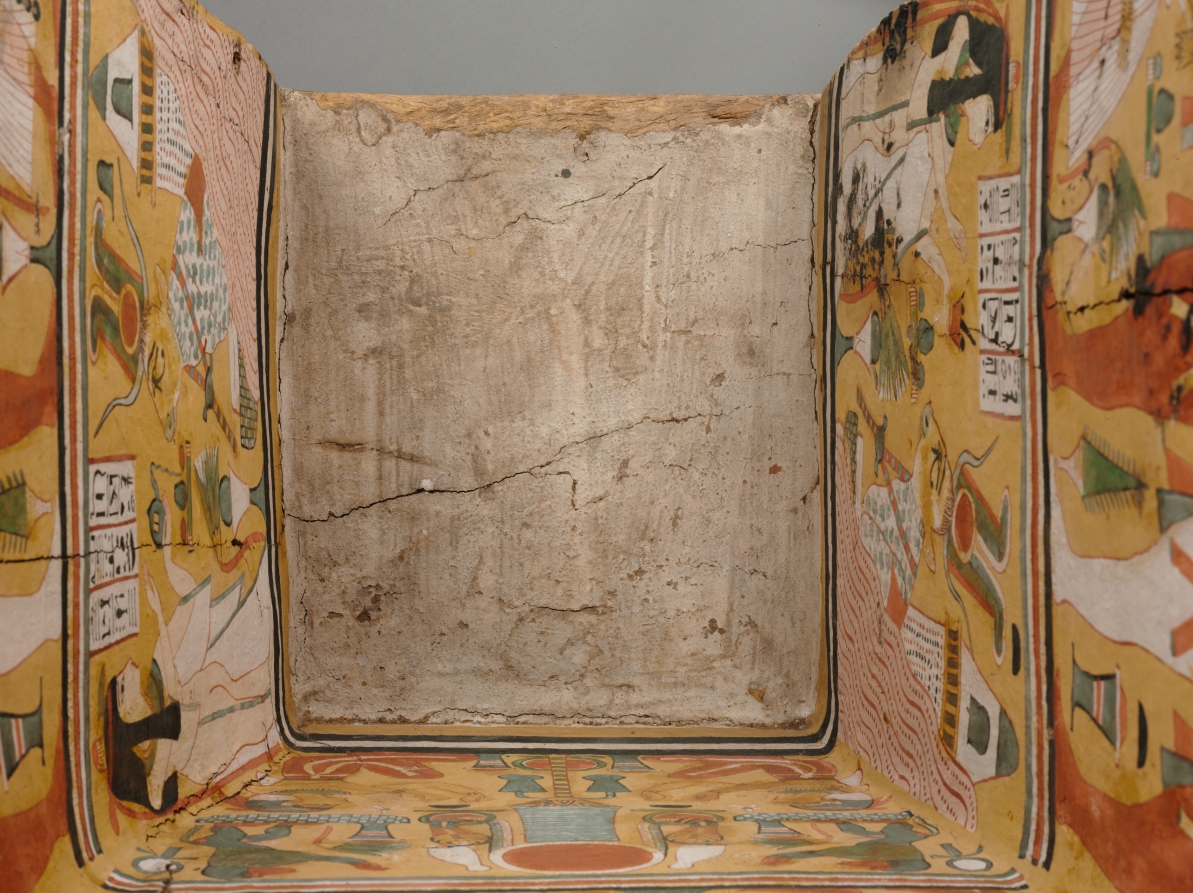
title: Coffin of Nesykhonsu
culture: Egypt, Thebes, Third Intermediate (1069–715 BCE), Dynasties 21–22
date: c. 976–889 BCE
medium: gessoed and painted sycamore fig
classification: Funerary Equipment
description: Egyptian coffins told stories and illustrated spells to help the deceased transition safely to the afterlife. Inside Nesykhonsu's coffin there are two jackals, one facing right and the other left, near the top. Here, the jackal represents the powerful deity Anubis, the god of the afterlife and embalming.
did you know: Two of Nesykhonsu's titles, "Lady of the House" and "Singer of the Choir of Mut the Great," are written on the outside of the coffin.